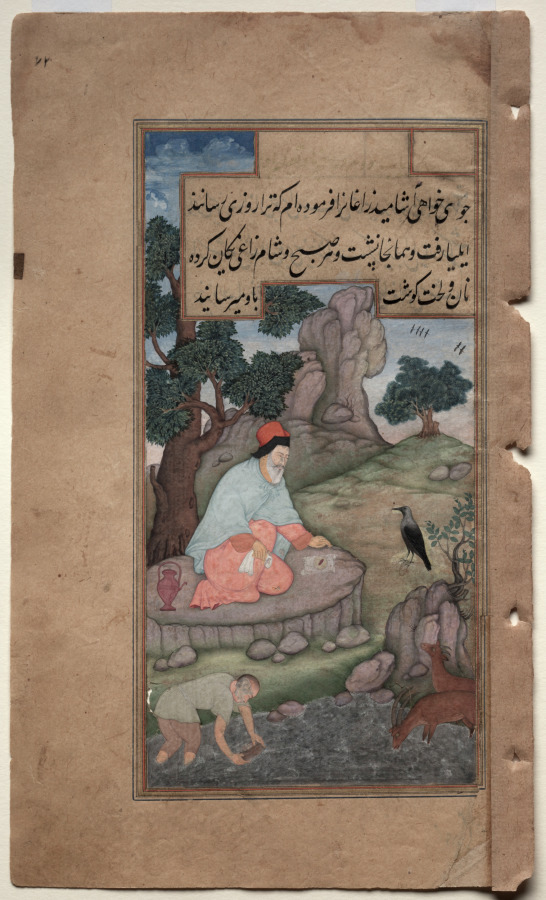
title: A raven brings food to Elijah (folio 72 recto), from a Mirror of Holiness (Mir’at al-quds) of Father Jerome Xavier,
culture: Mughal India, Allahabad, made for Prince Salim (1569–1627)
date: 1602–4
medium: Gum tempera, ink, color, and gold on paper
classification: Manuscript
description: The Old Testament prophet Elijah sits like an Indian holy man on a raised rocky platform under a tree. A raven has come to bring him bread and meat until the river runs dry, as commanded by God. Father Jerome recounted the story of Elijah to explain a reference made by Jesus in the context of his being rejected by the people of Nazareth, where he grew up. The unusual combination of Elijah’s salmon pink and light blue garments draws the viewer’s attention to him as the focus of the composition and echoes the paler hues of the sky.